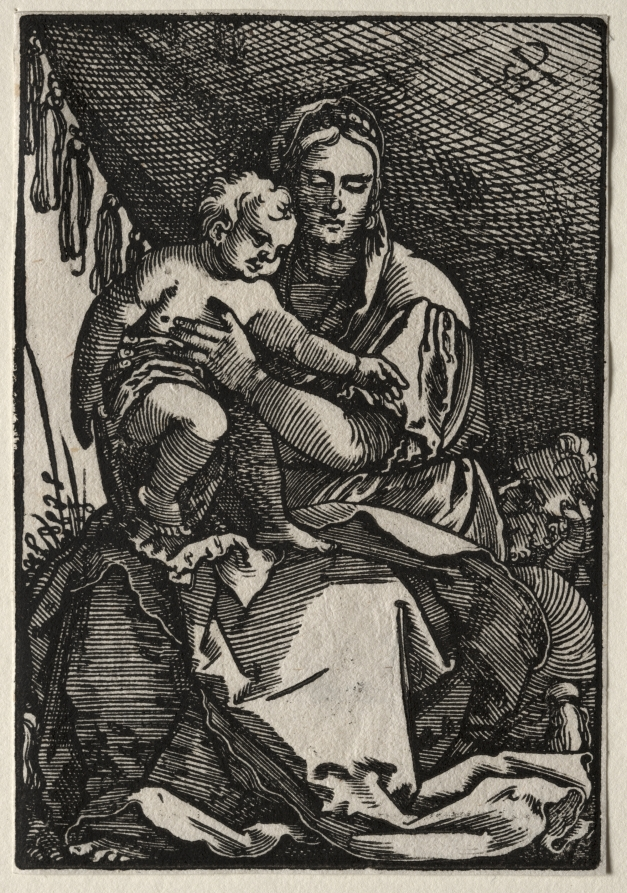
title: The Holy Family under a Tent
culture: Germany, 20th century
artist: Hans Sebald Beham (German, 1500–1550)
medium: woodcut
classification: Print